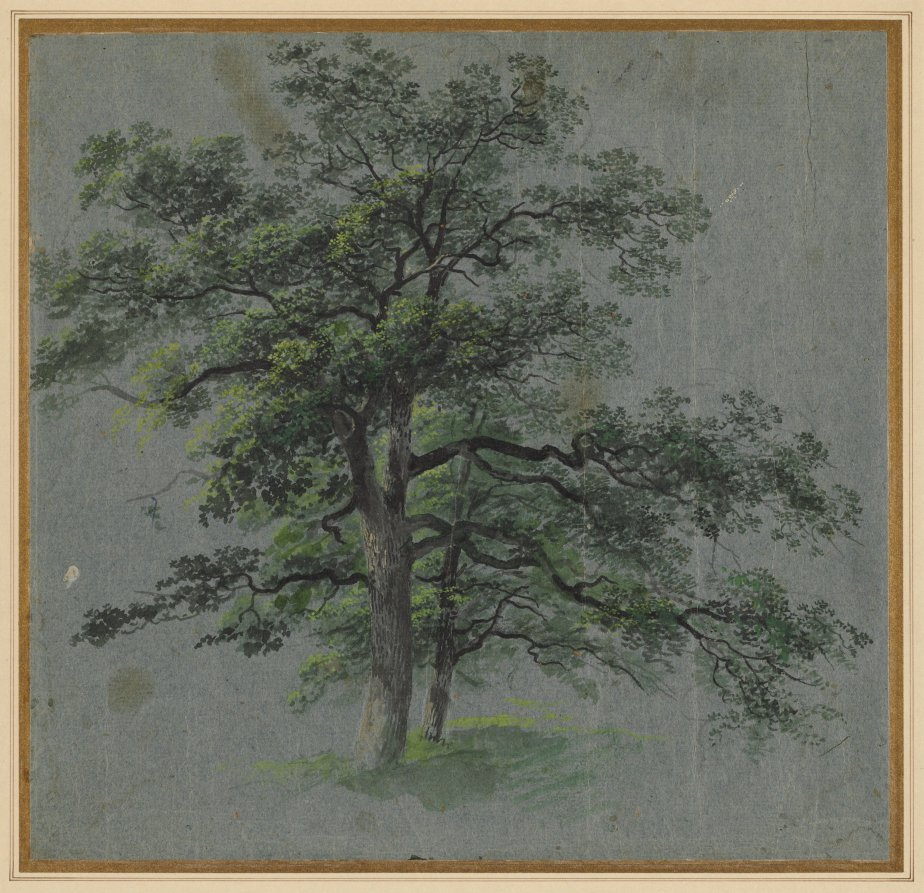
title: Two Trees (recto)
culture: Germany, 19th century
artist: Johann Jacob Dorner (German, 1775–1852)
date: 1800–1850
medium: brush and black and gray wash, gouache, and watercolor, with stylus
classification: Drawing